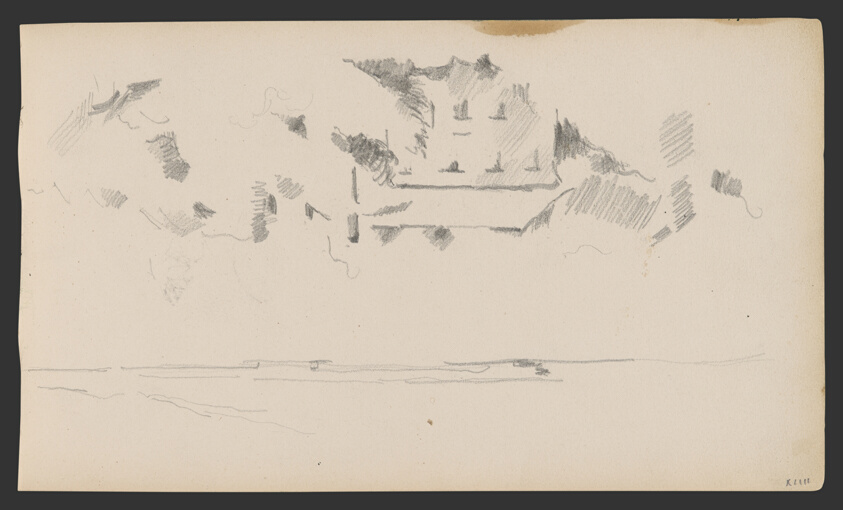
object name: Drawing and Watercolor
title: Sketchbook No. 2 (L'Estaque)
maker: Paul Cézanne; French, 1839-1906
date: 1875–86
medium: Graphite and pen and ink drawings on paper, bound into a book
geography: France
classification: sketchbook; graphite; prints and drawing; paper